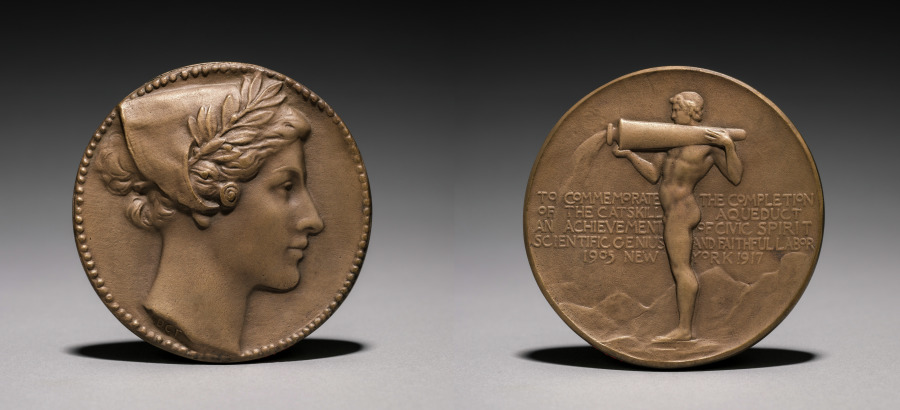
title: Medal Commemorating the Completion of Catskill Aqueduct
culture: America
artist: Daniel Chester French (American, 1850–1931)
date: 1918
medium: bronze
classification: Metalwork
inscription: inscribed: D.C.F.